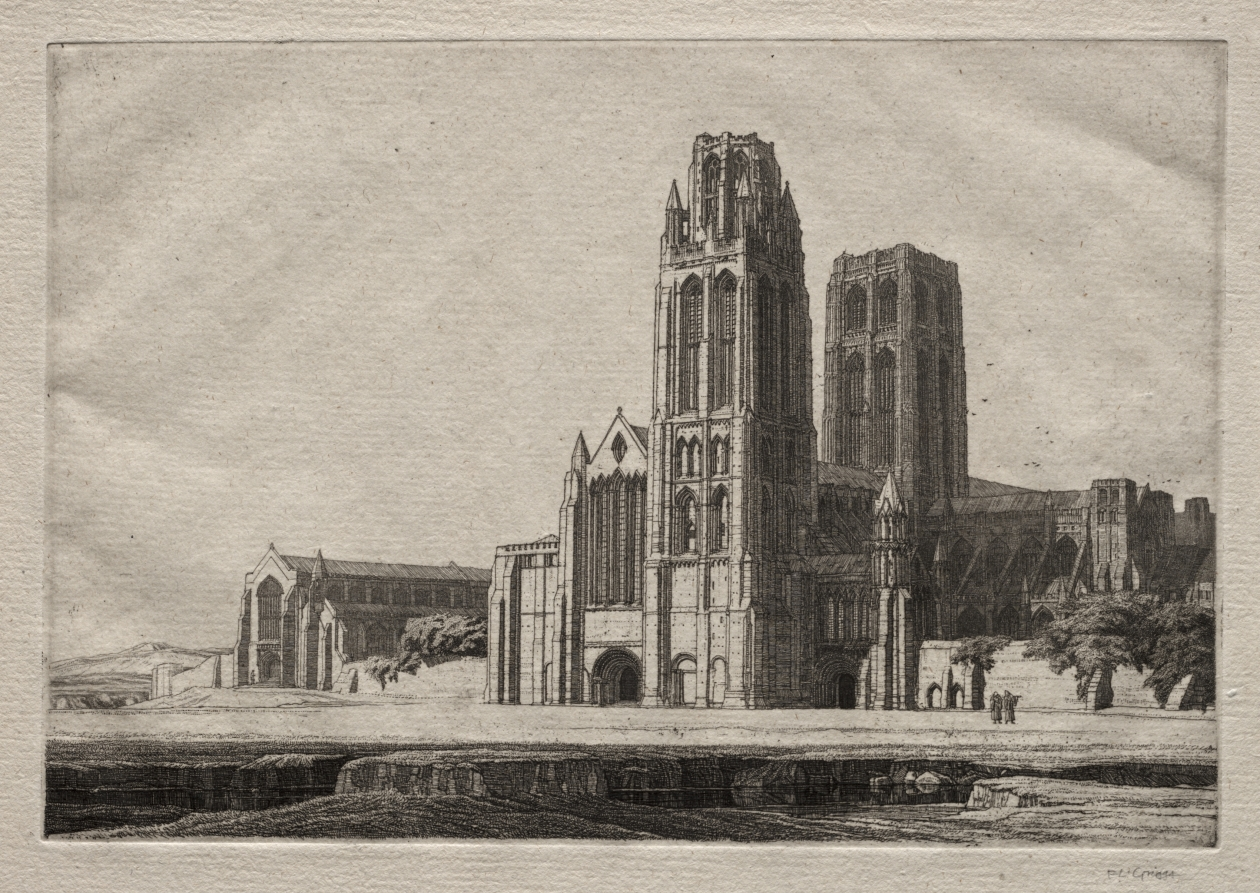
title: The Minster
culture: England, 20th century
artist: Frederick Landseer Maur Griggs (British, 1876–1938)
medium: etching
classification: Print